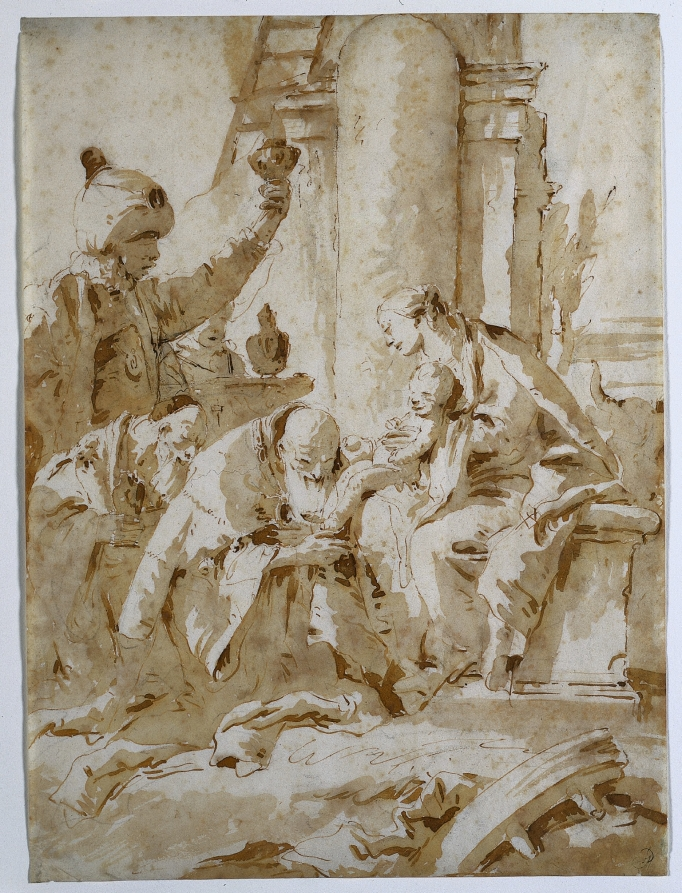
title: The Adoration of the Magi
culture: Italy, Venice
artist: Giovanni Battista Tiepolo (Italian, 1696–1770)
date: c. 1740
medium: pen and brown ink and brush and brown wash, over black chalk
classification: Drawing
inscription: verso, lower left, in graphite: [T?]. 5533; lower right, in graphite: [J?]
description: According to the Gospel of Matthew, three Magi, guided by a star, found the newborn Jesus and laid gifts of gold, frankincense, and myrrh before him. Giovanni Battista (Giambattista) Tiepolo’s drawing of the traditional subject places the Madonna on a platform as she holds the Christ child out toward three approaching magi. Two bearded white magi kneel in supplication as the turbaned black magi stands behind them. Tiepolo plays with the conventions of the Adoration subject by employing an asymmetrical composition. Working over his black chalk underdrawing, traces of which are visible in the figures’ robes, the artist delineated the scene with brown ink, quill pen, and brush before modeling with brown wash. Tiepolo’s mastery over value is evident in his contrasts of dark shadow with light midtones and the luminous white of his paper, producing his celebrated effects of glistening sunlight and clear atmosphere. The broken wheel in the foreground, an attribute of Saint Catherine, also appears in Tiepolo's etching of the same subject (1965.18) to which this drawing may be related.